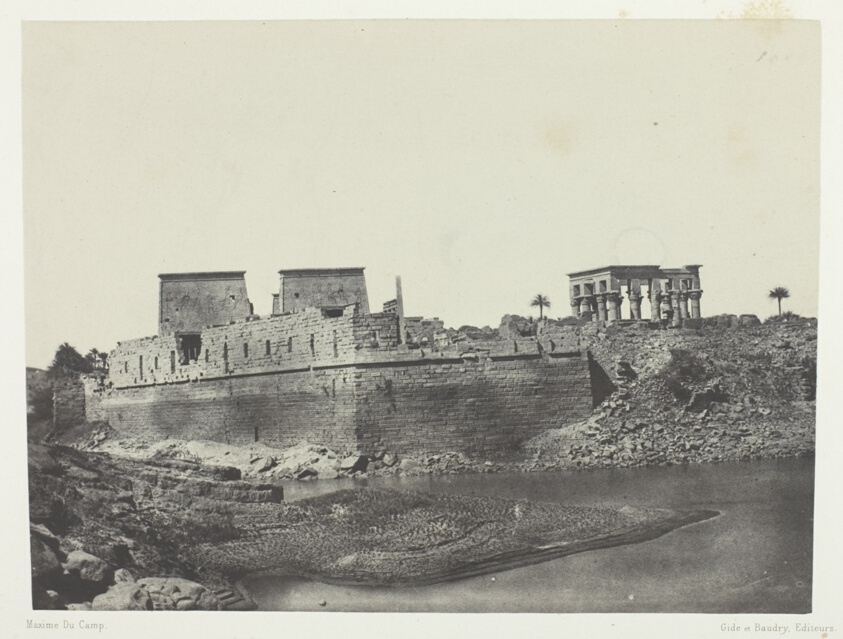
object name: Photograph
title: Vue Prise à l'Angle Sud-Ouest, Philoe; Nubie, plate 69 from the album "Egypte, Nubie, Palestine et Syrie" (1852)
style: 19th century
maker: Maxime Du Camp (French, 1822–1894)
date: 1849/51, printed 1852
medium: Salted paper print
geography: France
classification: salted paper print; photographic process; photography; photograph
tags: Collected by Hugh Edwards, Egypte, Nubie, Palestine et Syrie